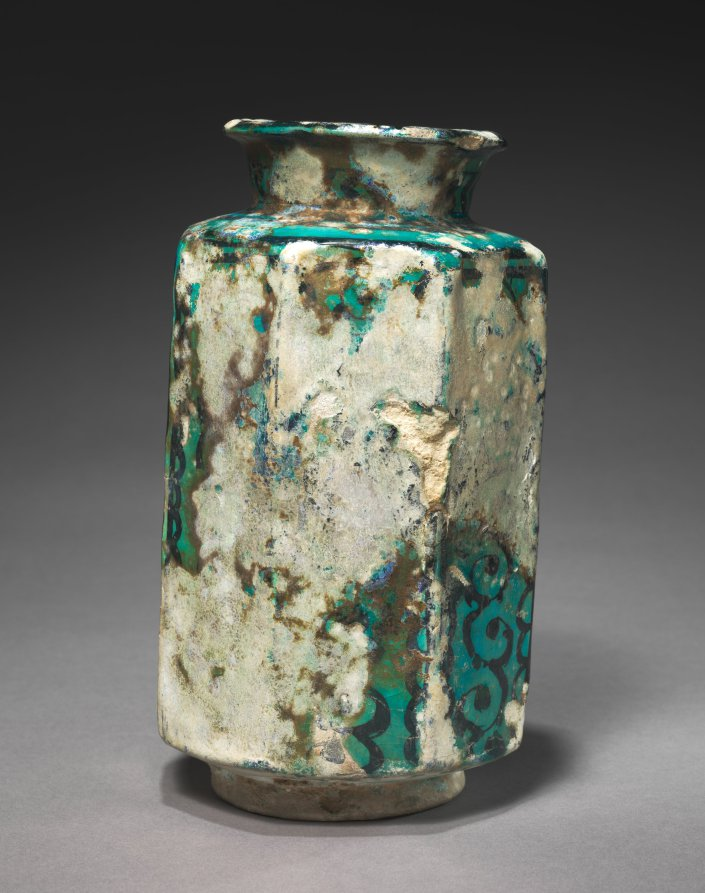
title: Albarello Jar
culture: Syria (Raqqa), Ayyabid Period, 13th Century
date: 1200s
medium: fritware with underglaze-painted design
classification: Ceramic